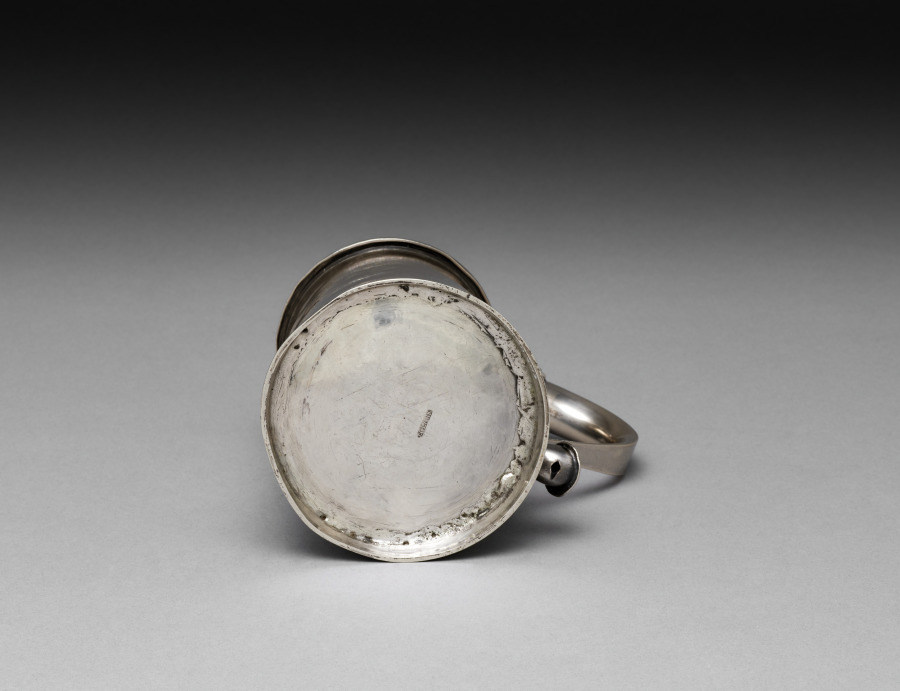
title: Tankard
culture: America, Massachusetts or Rhode Island, 18th century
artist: Jonathan Clarke (American, 1706–1766)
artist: or Joseph Clark (American)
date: c. 1750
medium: silver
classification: Silver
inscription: Engraved on handle: "B" over "I*E".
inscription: Stamped on handle: "Georgius II Deui Gratia".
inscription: Stamped underside: "I. Clark".